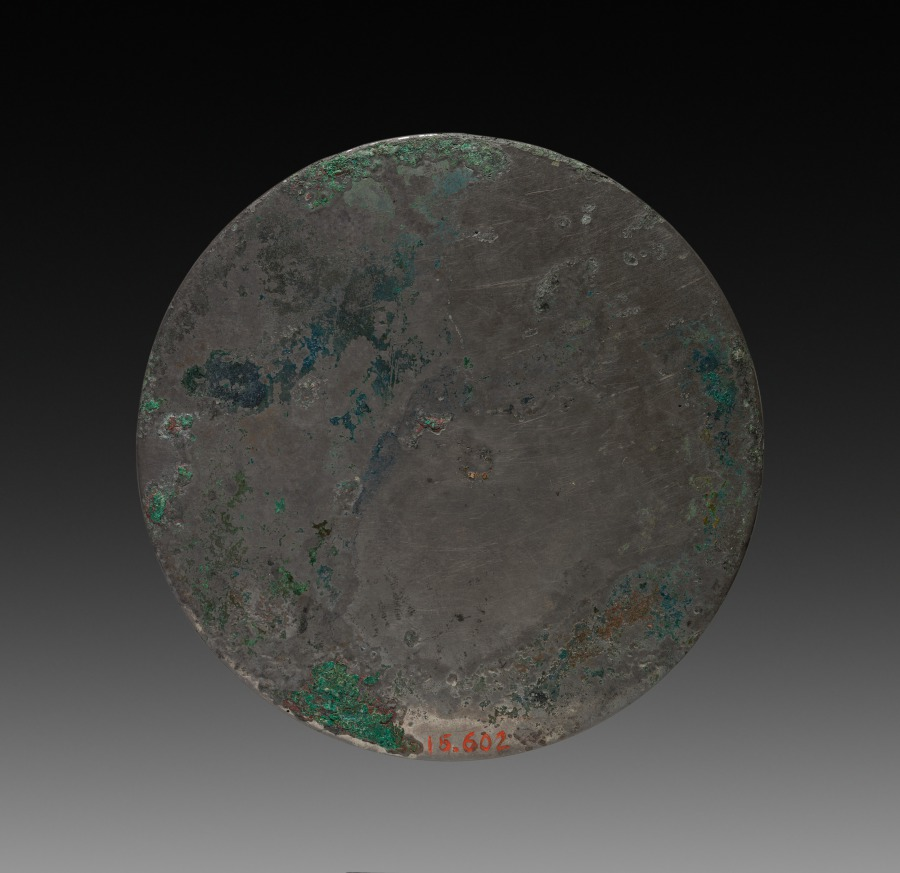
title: Mirror of the "Deities and Beasts"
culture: China, early Six Dynasties Period (317-581)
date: 300–400 CE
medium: bronze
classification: Metalwork